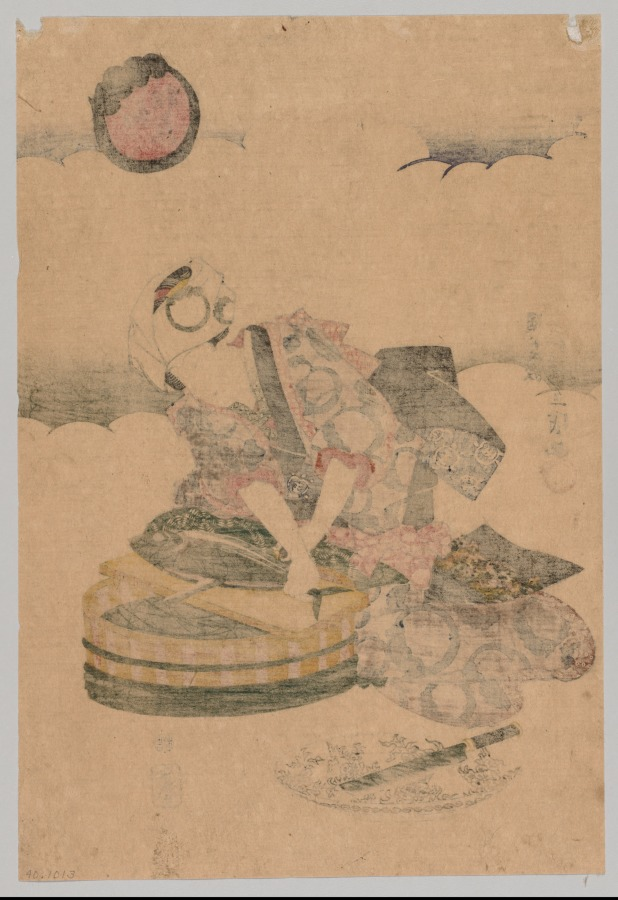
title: First Bonito of the Year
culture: Japan, Edo period (1615–1868)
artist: Utagawa Kunisada (Japanese, 1786–1865)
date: 1844–48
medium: color woodblock print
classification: Print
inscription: Signature: Kunisada - second generation Toyokuni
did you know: Historically, the year's first bonito was available in the fourth lunar month, or around May.